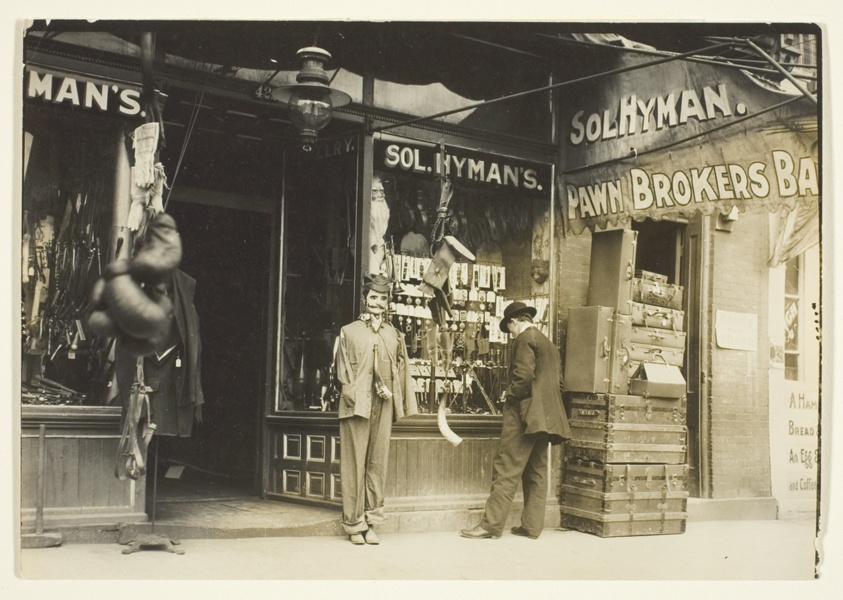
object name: Photograph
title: Guns for Sale, Nashville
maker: Lewis Wickes Hine (American, 1874–1940)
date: 1910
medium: Gelatin silver print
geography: United States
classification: gelatin silver (developing-out-paper) pr; photographic process; photography; photograph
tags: Collected by Hugh Edwards